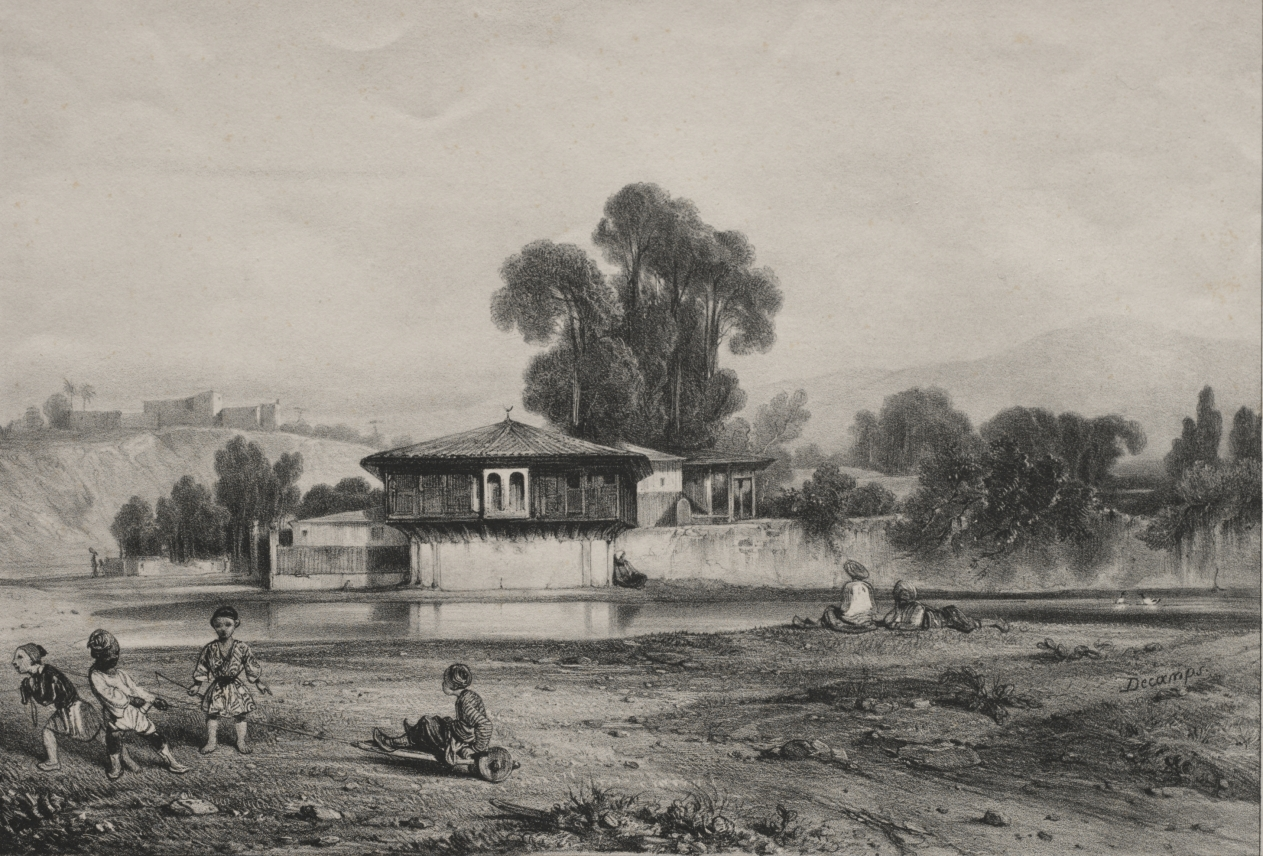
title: Pavilion at the Edge of a River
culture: France, 19th century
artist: Alexandre-Gabriel Decamps (French, 1803–1860)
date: c. 1833–60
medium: lithograph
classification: Print